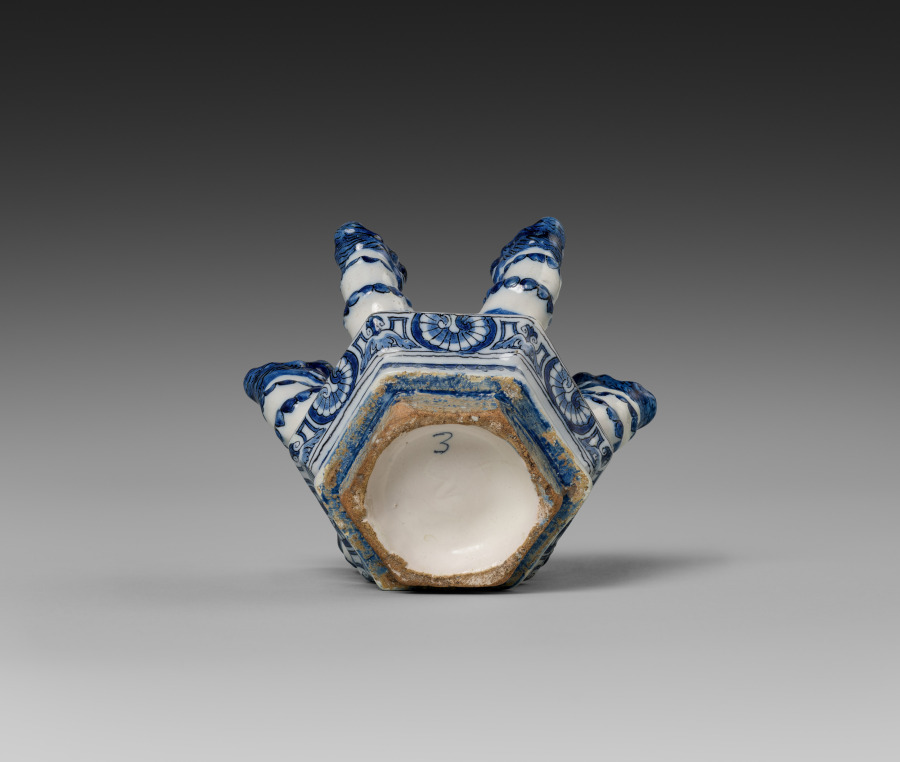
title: Fifth Tier for a Flower Pyramid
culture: Netherlands, Holland, Delft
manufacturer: Adrianus Kocx (Dutch, active 1686–1701)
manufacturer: De Grieksche A (The Greek A) Factory (Netherlands, 1658–1811)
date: c. 1690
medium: Tin-glazed earthenware, painted in blue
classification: Ceramic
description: Allegorical figures representing Faith, Hope, and Love decorate the base of this pyramid, on which rest six tiers with spouts where flowers can be placed. Flower pyramids are among the most complex and luxurious types of ceramics produced in Delft in the late 1600s. This example was made in the Greek A Factory, owned by Adrianus Kocx. During his tenure, the factory became the most prestigious of Delft potteries and received commissions from Queen Mary II, who ruled over England, Scotland, and Ireland together with her husband, William III. She contributed to the international spread of the fashion for Delft ceramics.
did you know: The iconic blue-and-white ceramics from Delft originated as an attempt to copy Chinese porcelain.